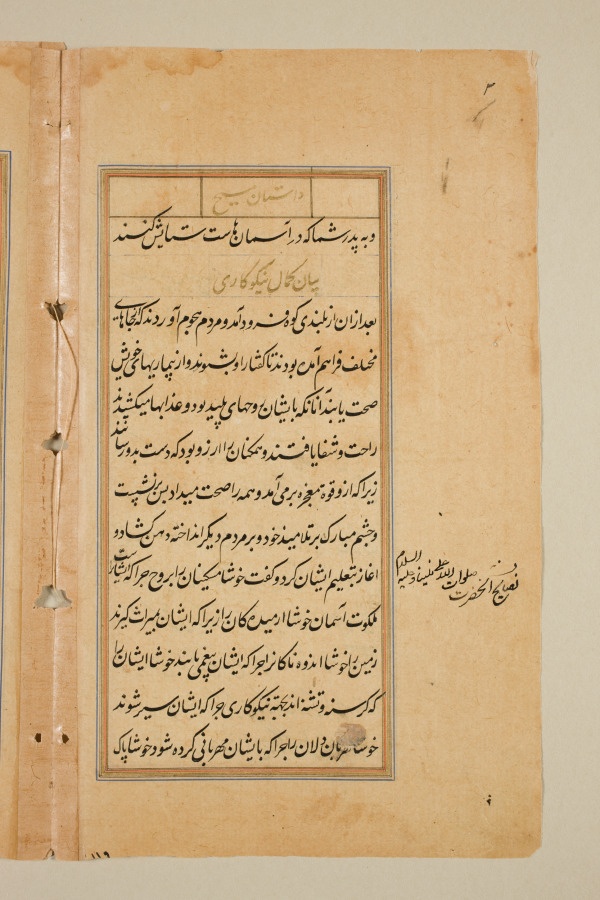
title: Text page from a Mirror of Holiness (Mir’at al-quds) of Father Jerome Xavier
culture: Mughal India, Allahabad, made for Prince Salim (1569–1627)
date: 1602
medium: Ink and gold on paper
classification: Manuscript